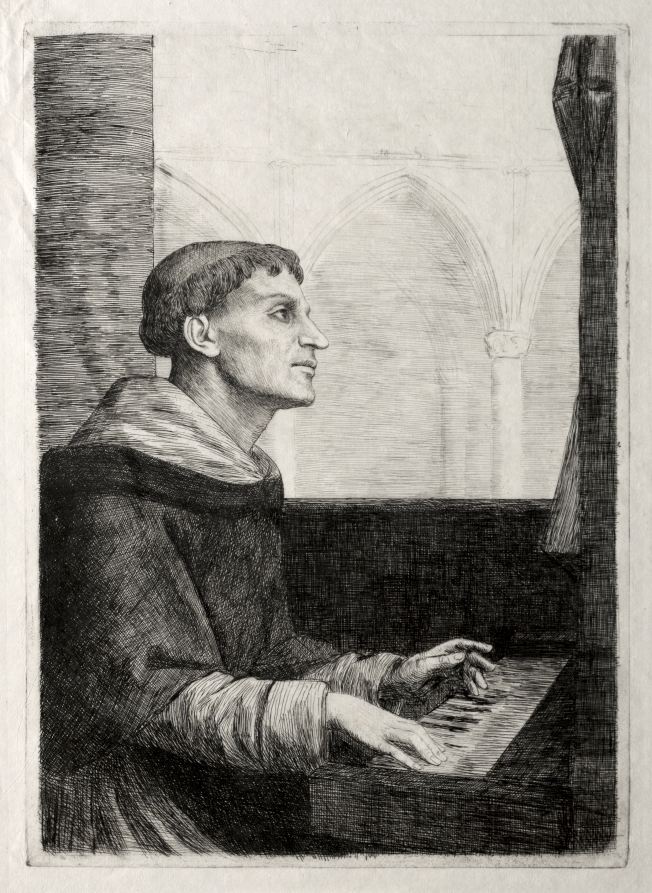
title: The Monk at the Organ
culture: France, 19th century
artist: Alphonse Legros (French, 1837–1911)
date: 1870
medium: etching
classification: Print